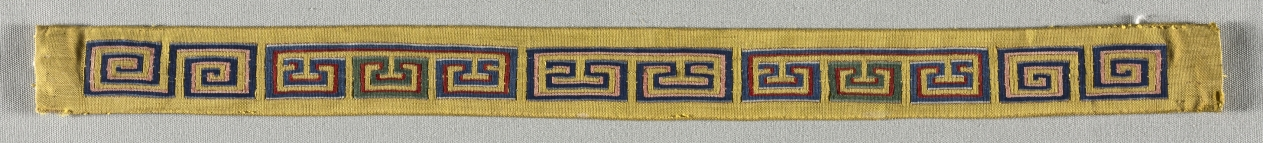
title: Cushion Cover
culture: China, Qing dynasty (1644-1911)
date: 1700s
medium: silk, metallic thread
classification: Textile